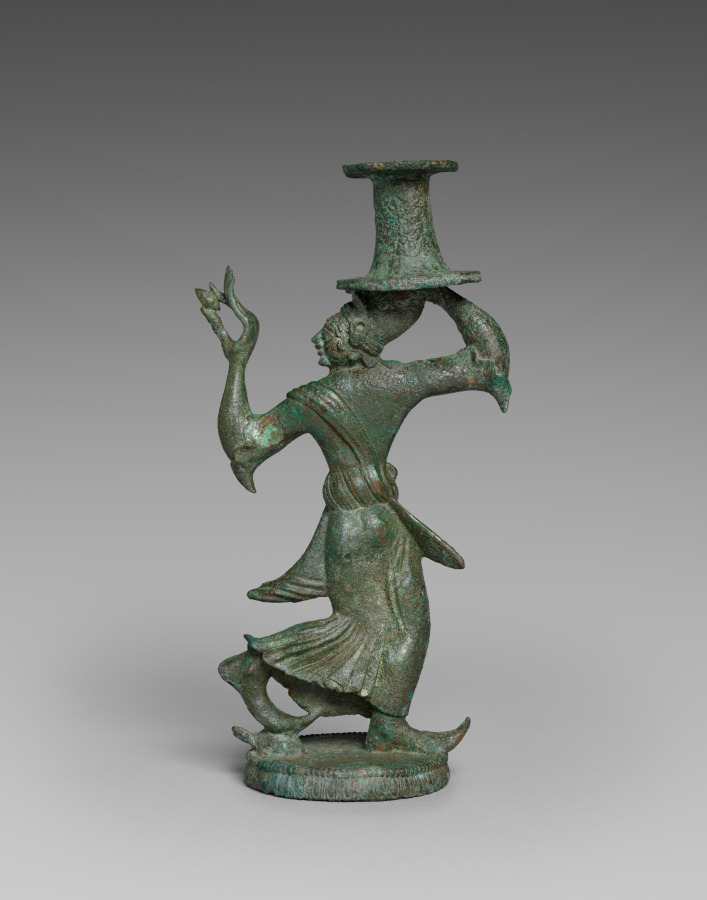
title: Candelabrum Stand of a Dancing Maenad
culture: Etruscan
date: 525–500 BCE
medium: bronze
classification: Sculpture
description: Conceived primarily in two dimensions—front and rear silhouette—this small bronze dancer probably once belonged to an elaborate candelabra or incense burner. The exaggeratedly long fingers and pointed shoes characterize the work as Etruscan, as do the stylized folds of the figure’s dress, which add visual interest but not verisimilitude. While her right hand holds above her head a cylindrical support, her left squeezes a small object, perhaps a fruit or clapper.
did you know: A small turtle beneath the figure’s back foot suggests a rustic setting.